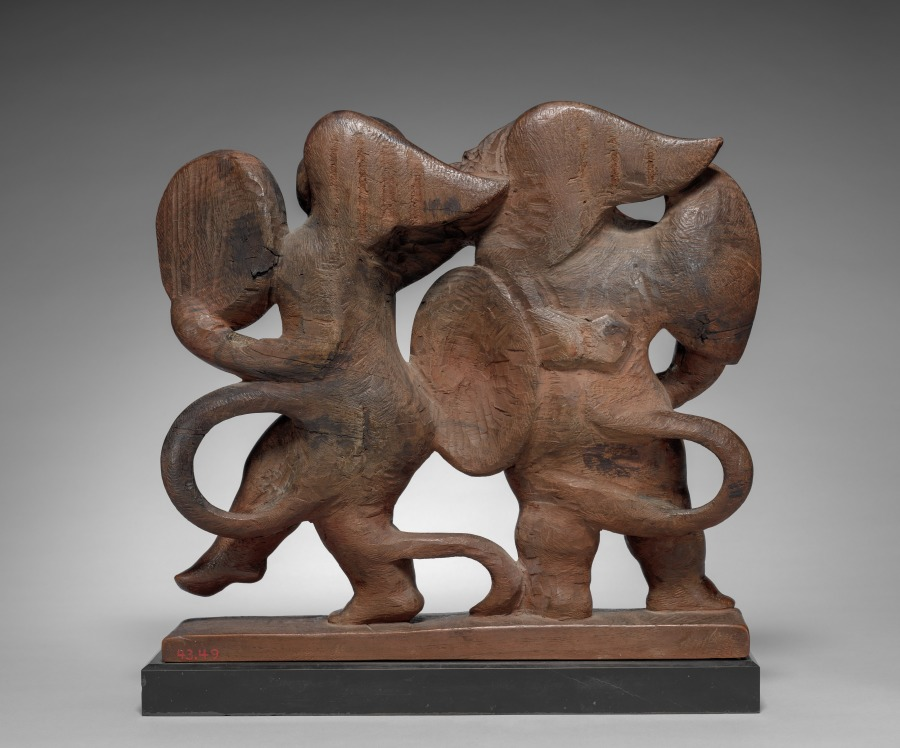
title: Dancing Children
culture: America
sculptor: Gaston Lachaise (American, born France, 1882–1935)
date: 1923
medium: wood with traces of gilt and polychrome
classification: Sculpture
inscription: Signed on right end of base: G. LACHAISE 1923